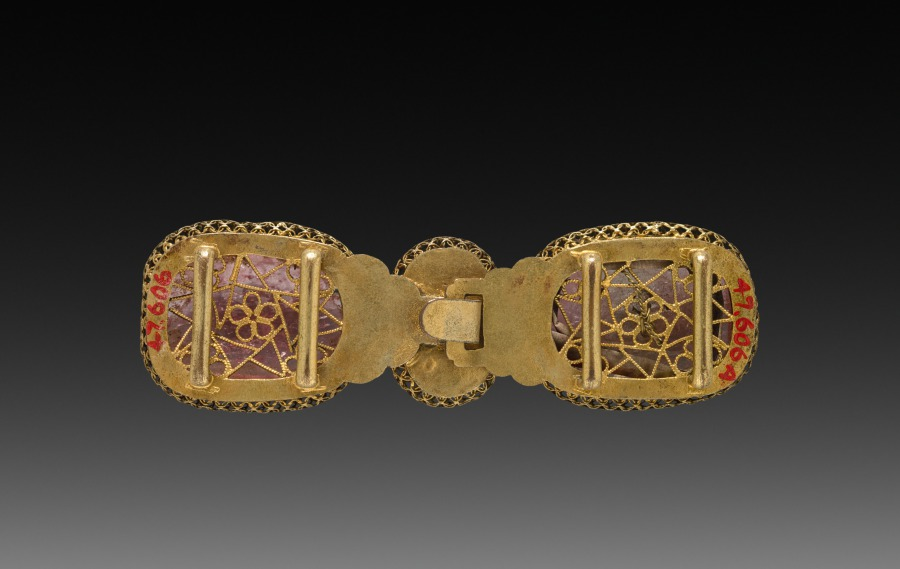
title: Buckle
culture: China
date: 1900s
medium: brass gilt wire work set with rose quartz and jade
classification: Jewelry